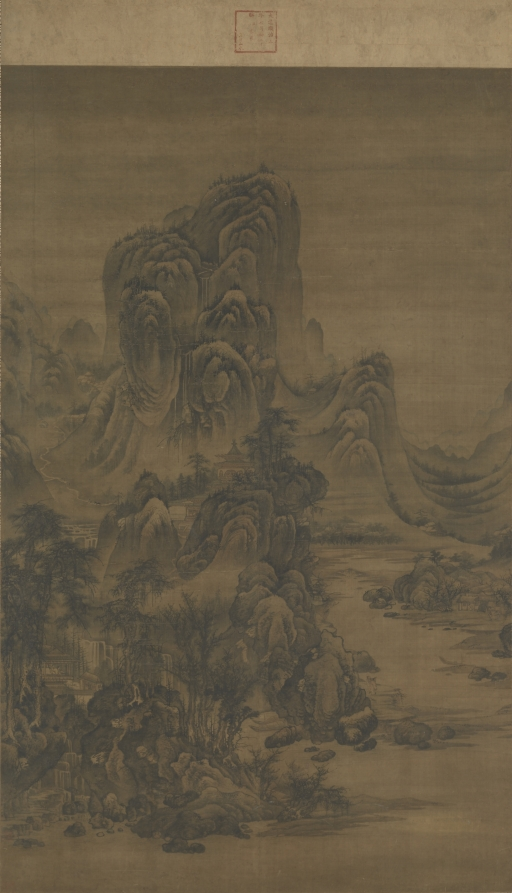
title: Landscape in the Style of Juran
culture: China, Ming dynasty (1368–1644)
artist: attributed to Liu Du (Chinese, active c. 1628-after 1653)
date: 1368–1644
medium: Hanging scroll mounted as a panel; ink and slight color on silk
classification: Painting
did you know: There is a tiny apocryphal signature under the overhanging rocks on the lower left side.